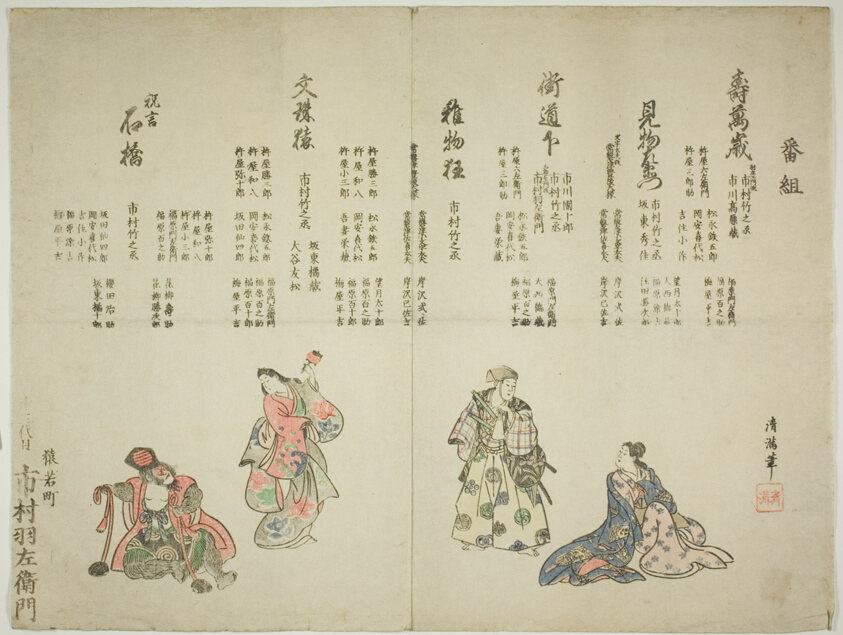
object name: Print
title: Program of the ten day performance celebrating the succession of Ichimura Uzaemon XIII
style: Japanese (culture or style)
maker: Torii Kiyomitsu II (Kiyomine) (Japanese, 1787–1868)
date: 1851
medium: Color woodblock print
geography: Japan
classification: woodblock print; print; asian art